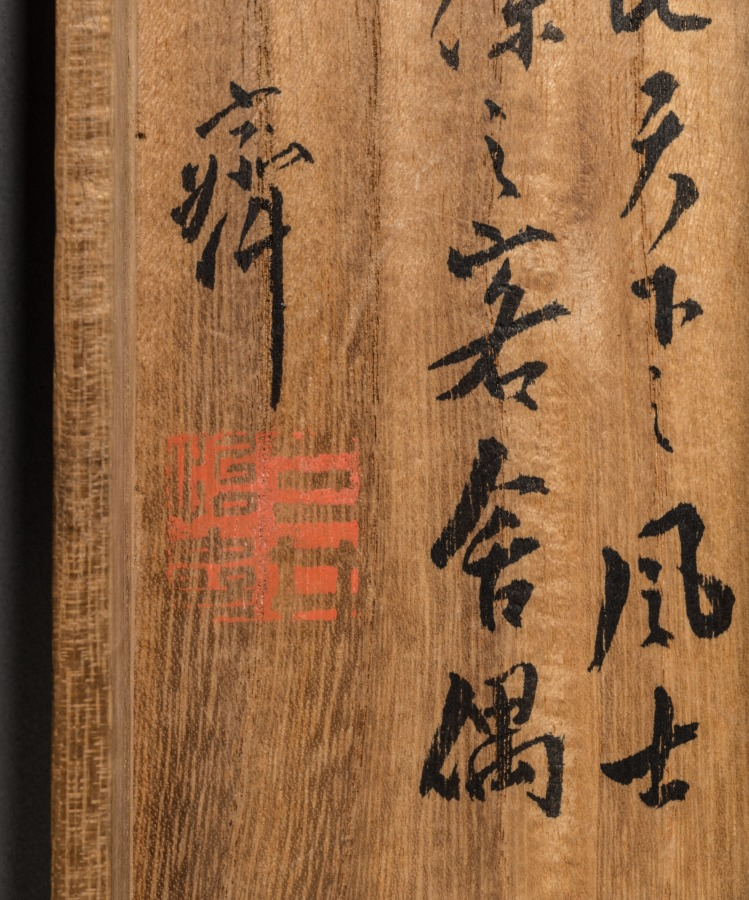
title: Landscape with Gentle Peaks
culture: Japan, Edo period (1615–1868)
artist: Kan Tenju (Japanese, 1727–1795)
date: 1767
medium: hanging scroll; ink and light color on paper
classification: Painting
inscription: 雨過嵐光煙／雲陽樹影諫／夕陽独在左／？卷讀残書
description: A figure sits in a retreat tucked into the mountains near a waterfall. The painter, Kan Tenju, was best known as a calligrapher and seal carver. Of Korean heritage, he was a patron of artist Ike Taiga (池大雅) (1723–1776), and a cousin of Taiga’s student Aoki Shukuya (青木 夙夜) (died 1802). His Chinese-style poem reads as follows: Smoky mist in the mountain reflects light after the rain, Sunlight passes through the clouds to cast shadows of the trees, Alone in the sunset, I read a well-worn book.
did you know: This painting combines image and calligraphy, connected by skillful brushwork.